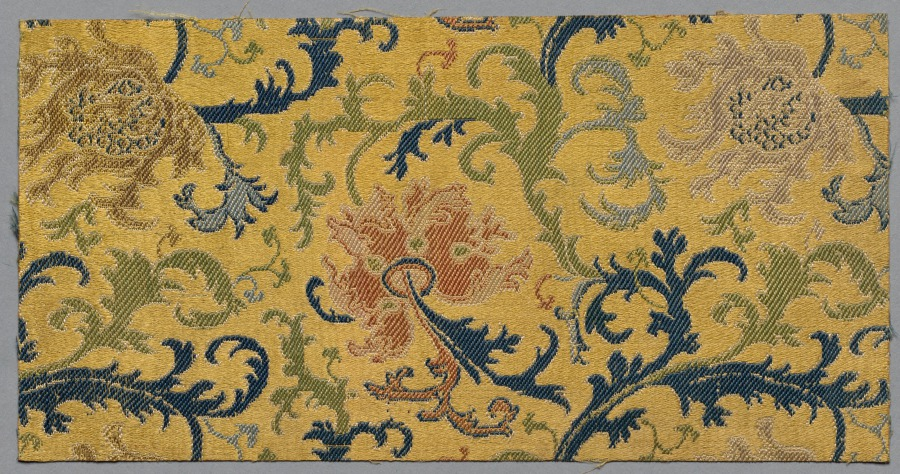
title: Fragment from Book of Textiles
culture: China, Qing dynasty (1644-1911)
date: 1700s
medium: satin ground; silk diasper weave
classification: Textile